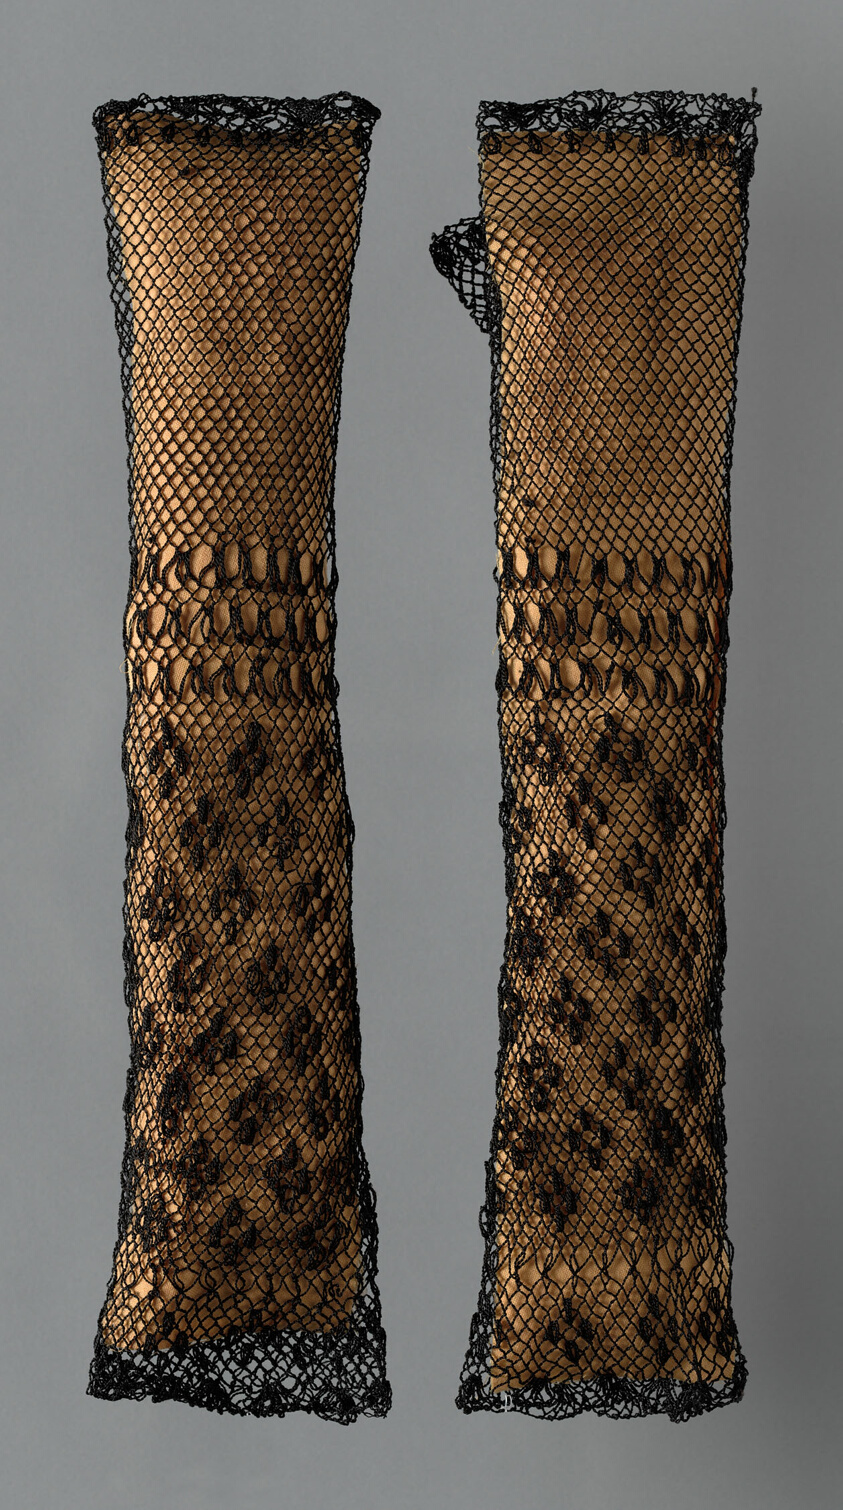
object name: Textile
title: Pair of Mittens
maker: Europe or United States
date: 1825/75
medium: Silk, bands of bunch, Valenciennes, spider netting, square netting, and square netting with looped tufts (lacis)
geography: Europe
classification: textile; needlework (visual works); lace; lace - needle; costume; costume - lace; costume accessory